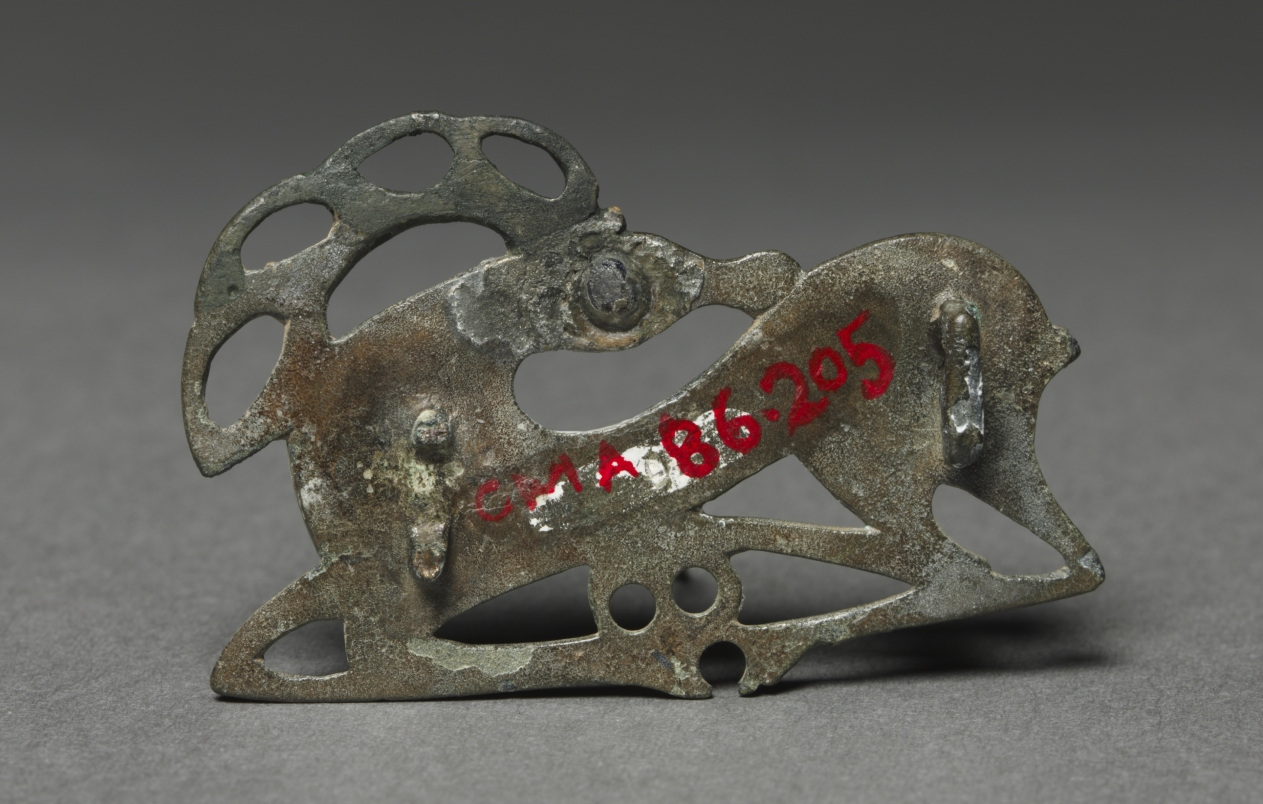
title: Fibula in the Form of a Recumbent Stag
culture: Northeastern Europe, 5th century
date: c. 400 CE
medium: bronze with glass inlay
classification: Jewelry